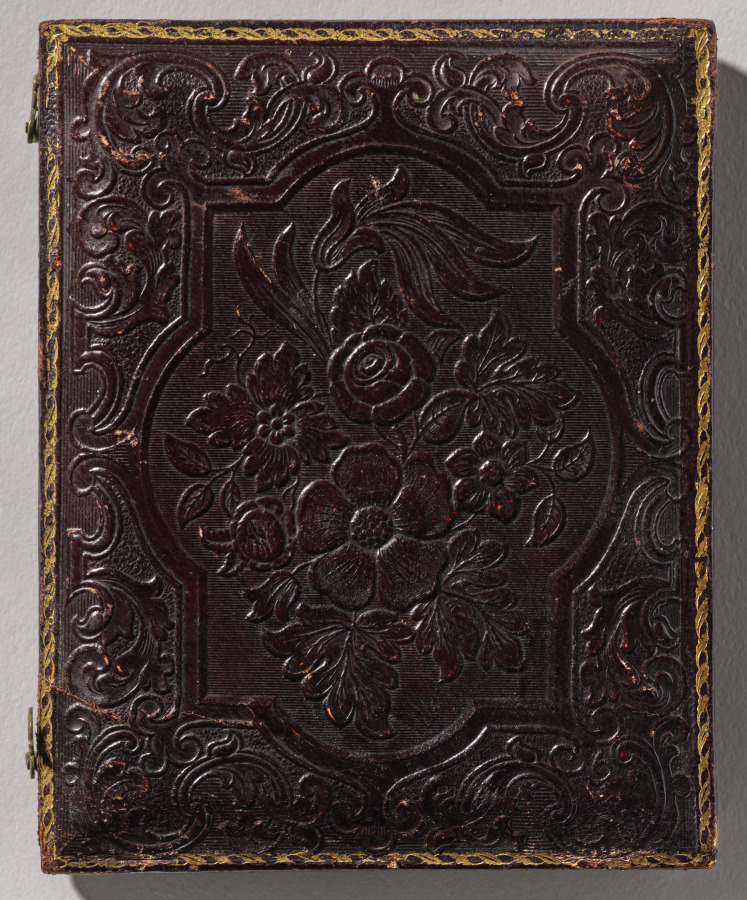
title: Dead Child On a Sofa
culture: America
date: c. 1855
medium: daguerreotype, applied color, quarter-plate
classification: Photograph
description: This carefully staged daguerreotype of a dead child is an outstanding example of a very common subject: the postmortem portrait. Using the stylistic conventions of the day, the unidentified artist successfully created a visually pleasing scene, despite the nature of the image. Dressed in white with a bouquet of flowers on the chest, the child, seen in profile, reclines on an elaborately patterned sofa. Delicate flesh tones were added to the cheek and arm, suggestive of a healthy child sleeping. The high rate of infant mortality throughout the 19th century made this variety of portraiture common, satisfying the emotional need of the parents to have a lasting memory of a loved one.